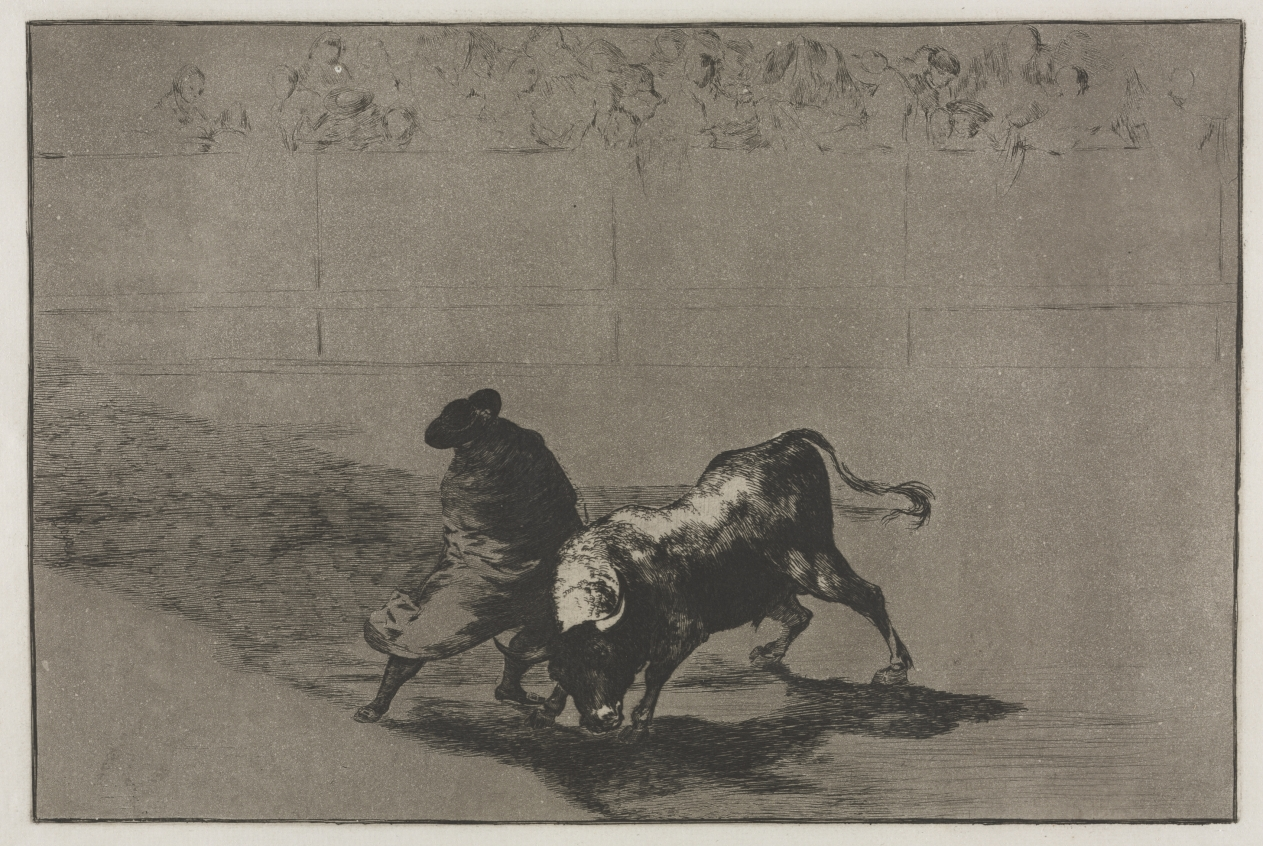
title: Bullfights: The Very Skilful Student of Falces, Wrapped in his Cape, Tricks the Bull with the Play of his Body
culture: Spain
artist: Francisco de Goya (Spanish, 1746–1828)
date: 1816, printed 1876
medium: engraving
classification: Print